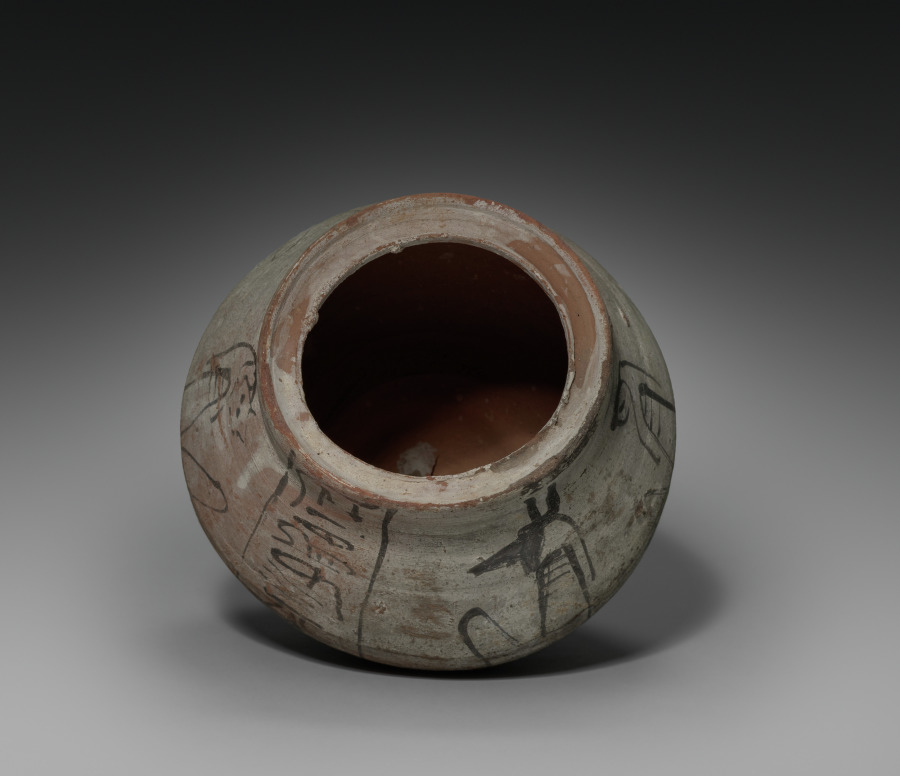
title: Shawabty Jar with Lid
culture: Egypt, New Kingdom (1540–1069 BCE), Dynasties 19–20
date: 1295–1069 BCE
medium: Nile silt ware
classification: Funerary Equipment